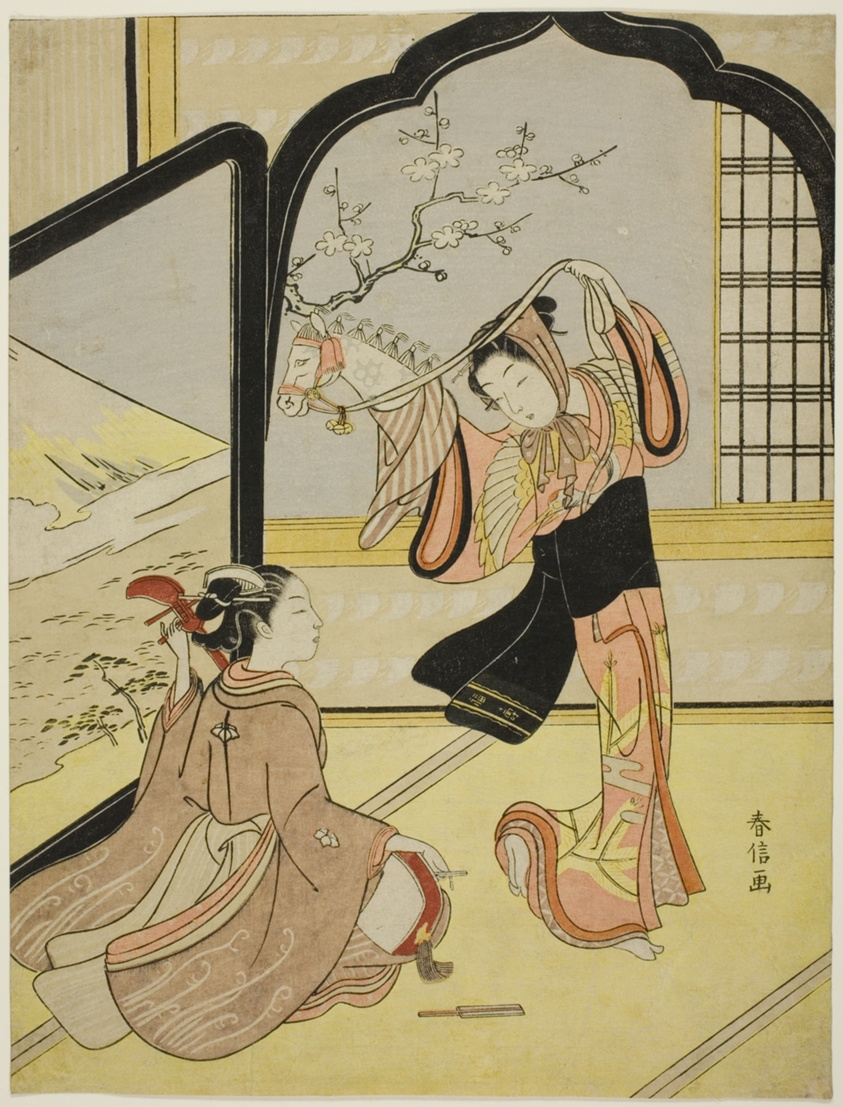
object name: Print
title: The Harugoma Dance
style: Japanese (culture or style)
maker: Suzuki Harunobu 鈴木 春信; Japanese, 1725 (?)-1770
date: c. 1767/68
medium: Color woodblock print; chuban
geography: Japan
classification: woodblock print; print; asian art